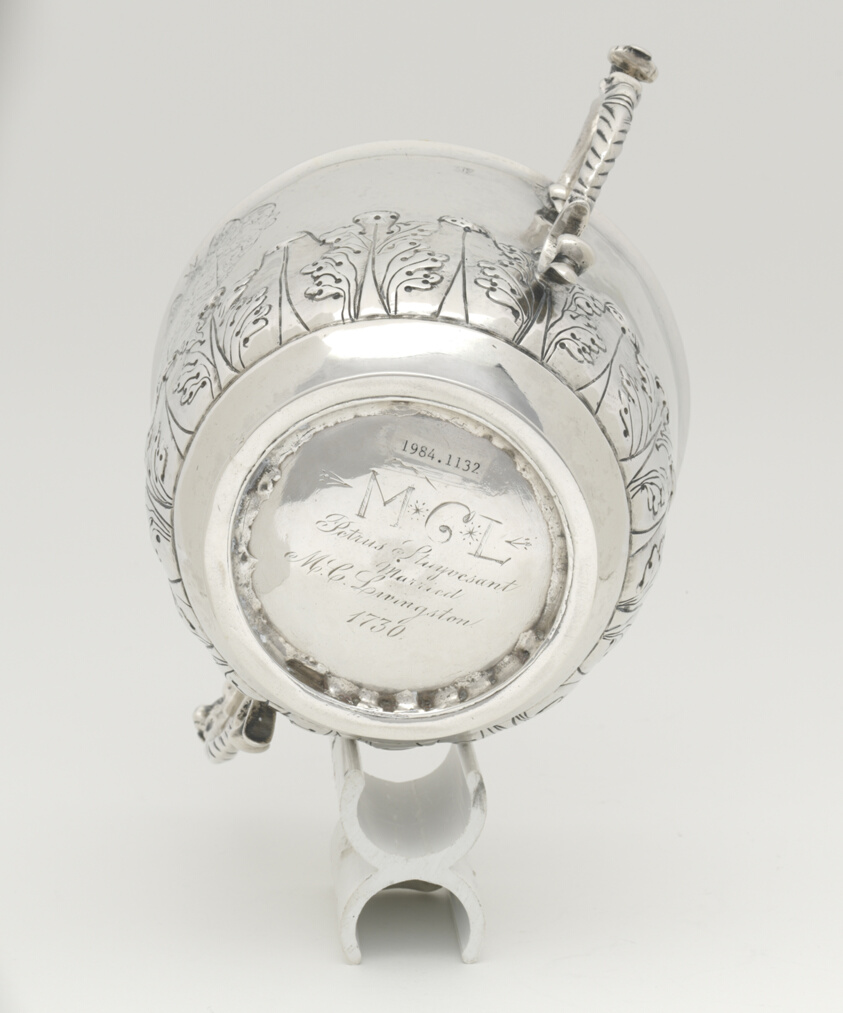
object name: Metalwork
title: Two-Handled Covered Cup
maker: Cornelius Kierstede; American, 1674–1757; New York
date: 1698–1720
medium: Silver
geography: New York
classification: drinking vessel; silver; american decorative arts; american arts; decorative arts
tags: servingware, floral, heirlooms, plant-derived motif, dining, drinking